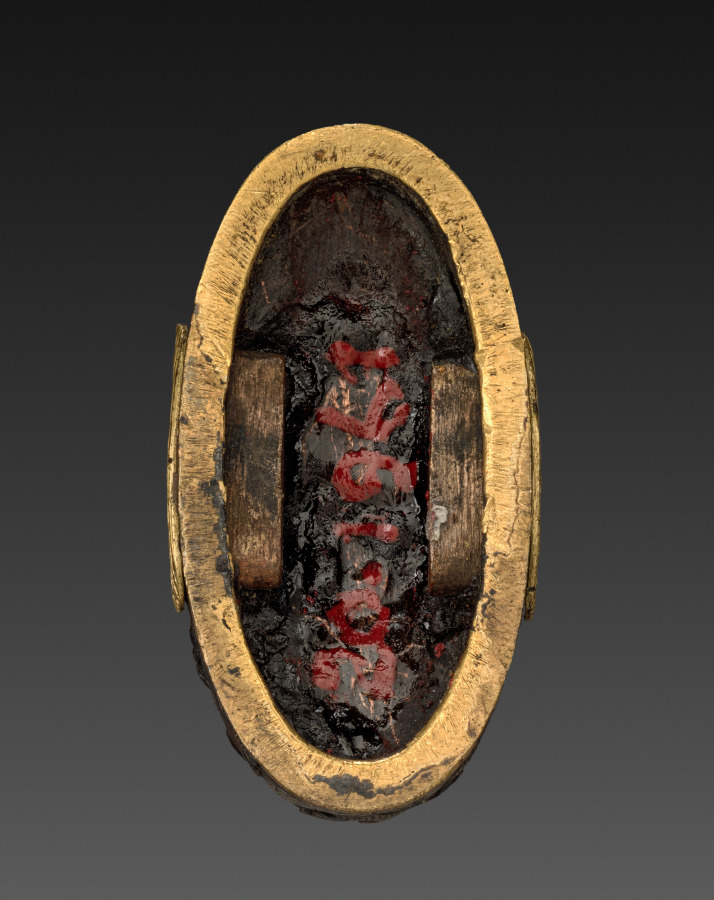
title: Sword-Hilt Pommel (Kashira)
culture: Japan, Edo period (1615–1868)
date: 1700–1850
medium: shakudo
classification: Arms and Armor